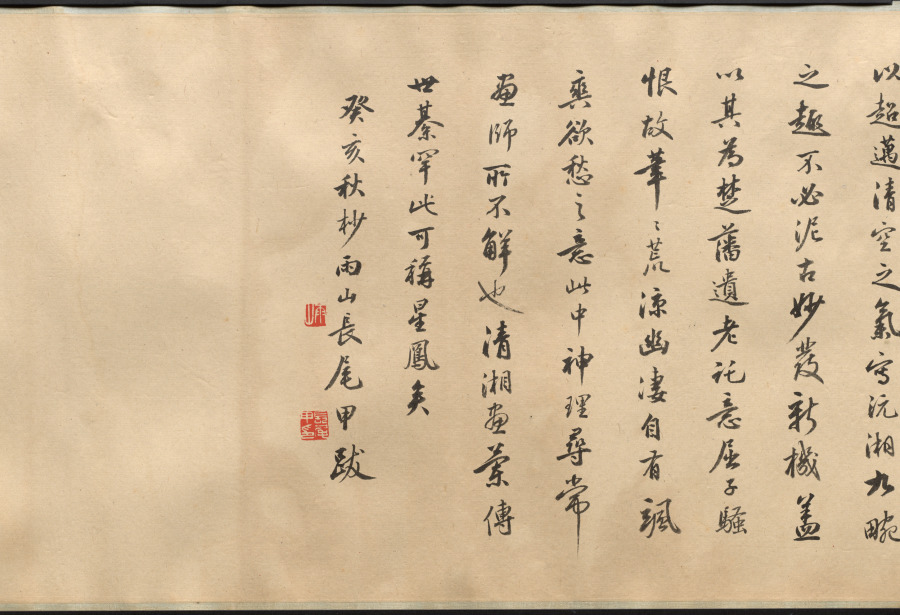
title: Rocks, Orchid, and Bamboo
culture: China, Qing dynasty (1644-1911)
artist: Shitao (Chinese, 1642–1707)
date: 1662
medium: handscroll; ink on paper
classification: Painting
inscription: Title colophon in four characters with signature and two seals on gold-flecked paper.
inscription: Artist's signature, inscription (with date of 1662), five seals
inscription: Colophon with two seals.